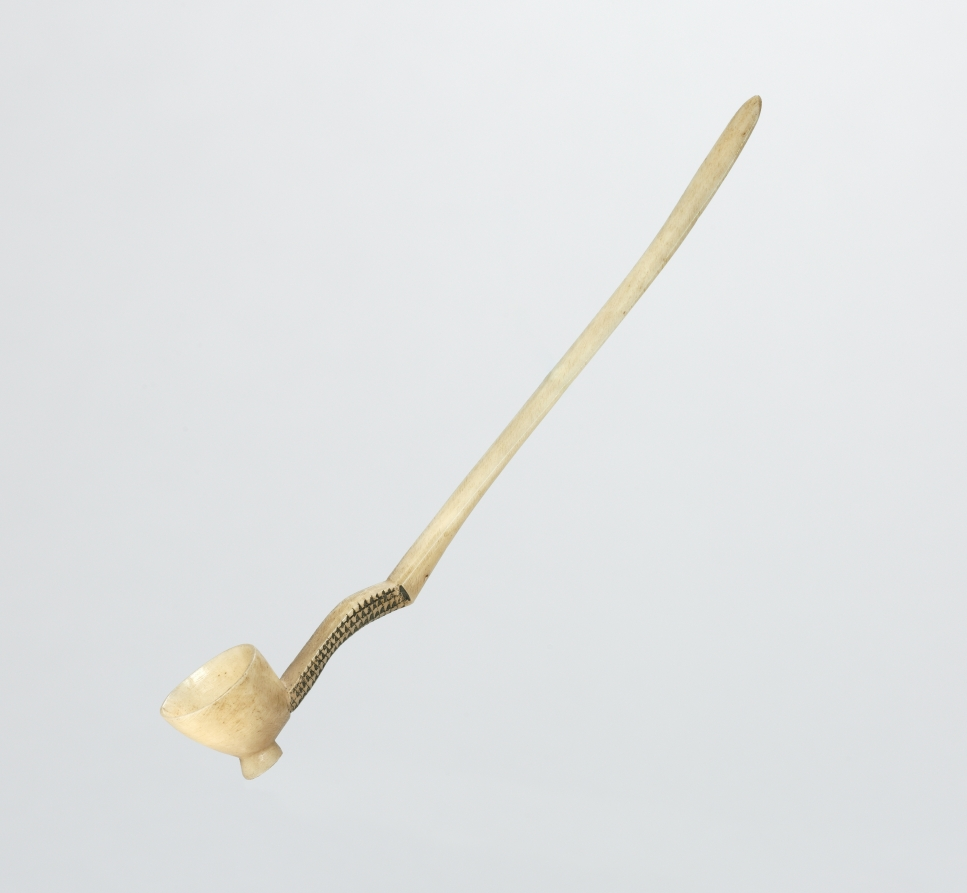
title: Snuff Spoon (intshengula or izintshengula)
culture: Africa, Southern Africa, South Africa, Zulu-style maker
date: late 1800s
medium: bone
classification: Implements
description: Often, snuff spoons made from the rib of an ox or cow were subtly carved to suggest a female body. Decorated with incised designs blackened with cattle fat and ash, many are true hybrid objects, combining a spoon with a long-tined comb or hairpin. Such spoons were typically worn as ornaments in the hair or even the beard, thus signaling the social standing of their wearer.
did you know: Such spoons were typically worn as ornaments in the hair or even the beard, signaling the social standing of their wearer.